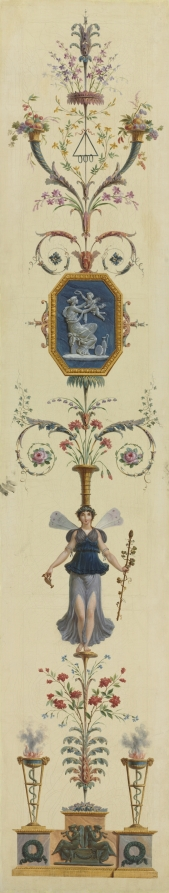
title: Decorative Panel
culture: France, 18th century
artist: Pierre Rousseau (French, 1751–1829)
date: 1790s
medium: oil on canvas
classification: Painting